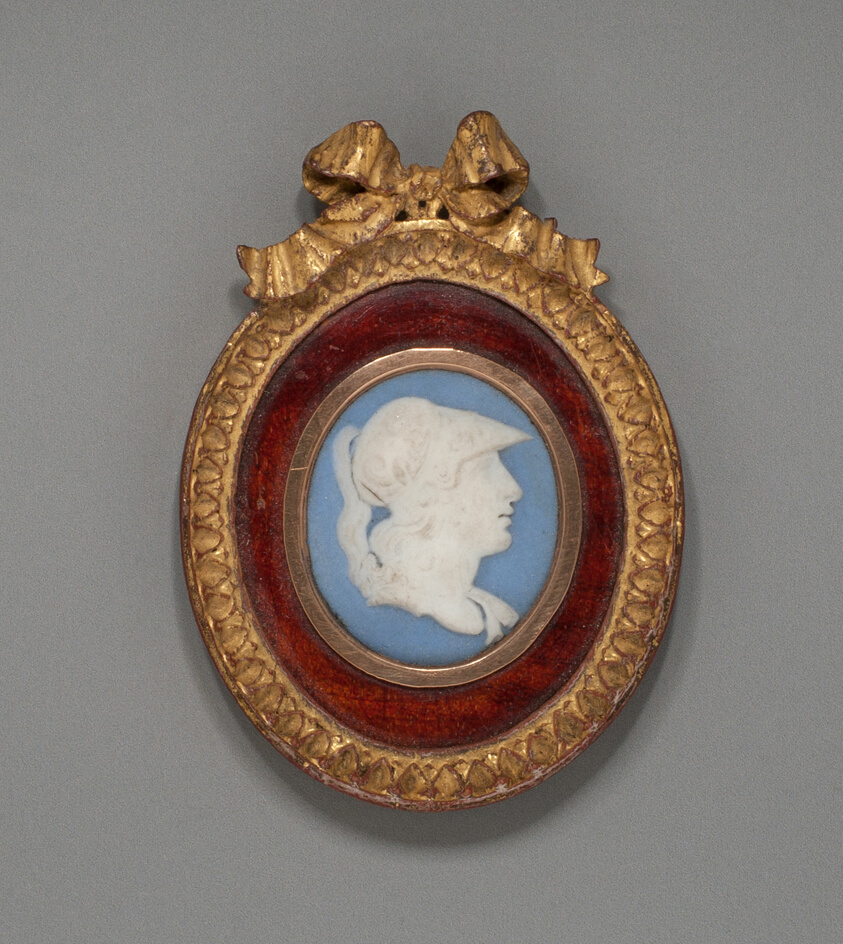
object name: Ceramics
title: Cameo with Minerva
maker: Wedgwood Manufactory (England, founded 1759)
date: Late 18th century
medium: Stoneware (jasperware)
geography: Burslem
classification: cameo (sculpture); sculpture; stoneware; european decorative arts; ceramics